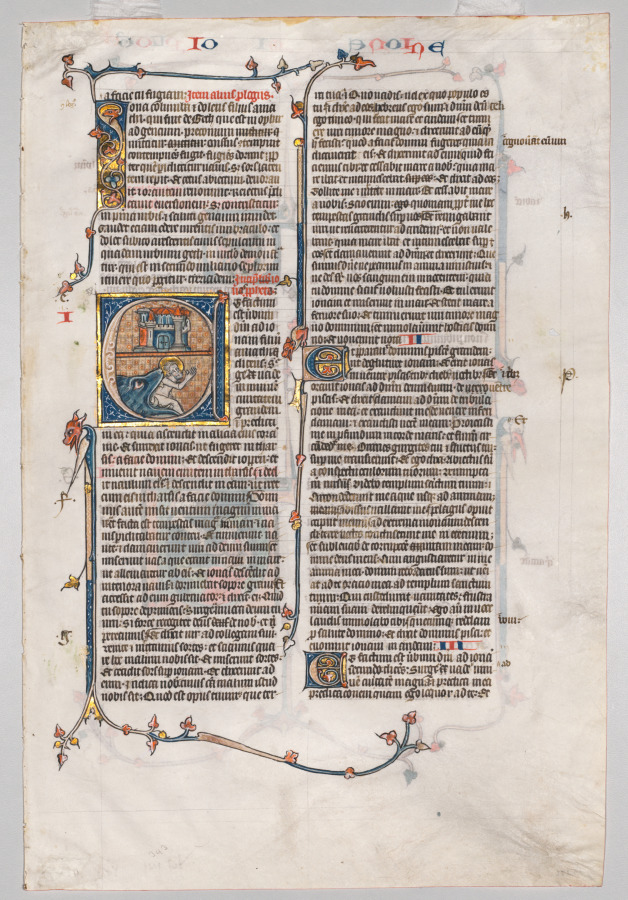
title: Single Leaf from a Bible: Initial E[t factum est] with Jonah Swallowed by the Whale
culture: France, Paris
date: c. 1290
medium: ink, tempera, and gold on vellum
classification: Manuscript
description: This leaf and the bifolium (double-leaf) displayed to the right both come from the same manuscript: a large lectern bible. The decorative scheme consists of a single historiated initial and spiky ivy-leaf tendrils along the margins, a Parisian convention just developing at this time. These "ascenders" and "descenders" originate from two of the initials and meander along the margins as separators and framing devices for the text. This ivy-leaf motif dominated book illumination in Paris through the early 15th century. The interior of the initial E contains a background of geometric patterns (called diapering) against which is set Jonah and the whale and the ancient city of Nineveh, the capital of the Assyrian Empire. The illusionistic effect creates three layers of perspective-the framing initial, the figures, and the background.